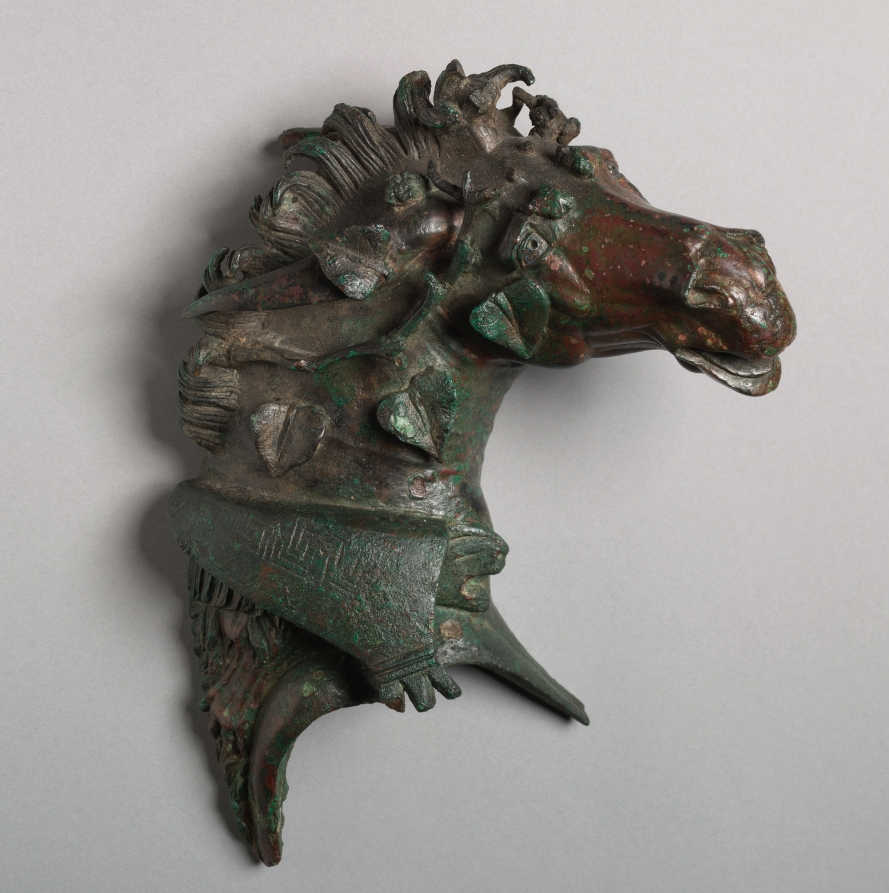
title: Mule-Head Attachment for a Couch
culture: Greece, Hellenistic period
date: 200–100 BCE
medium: bronze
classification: Sculpture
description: This bronze attachment in the shape of a mule’s head was once part of a fulcrum (armrest) for a banqueting couch. The mule’s mane flies upward, its mouth open and its ears pushed back against its head. The mule wears an ivy garland and a saddlecloth made from panther skin, two elements associated with the wine god Dionysos.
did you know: The pattern on the panther skin, called a meander, was also extremely popular on Greek pottery.